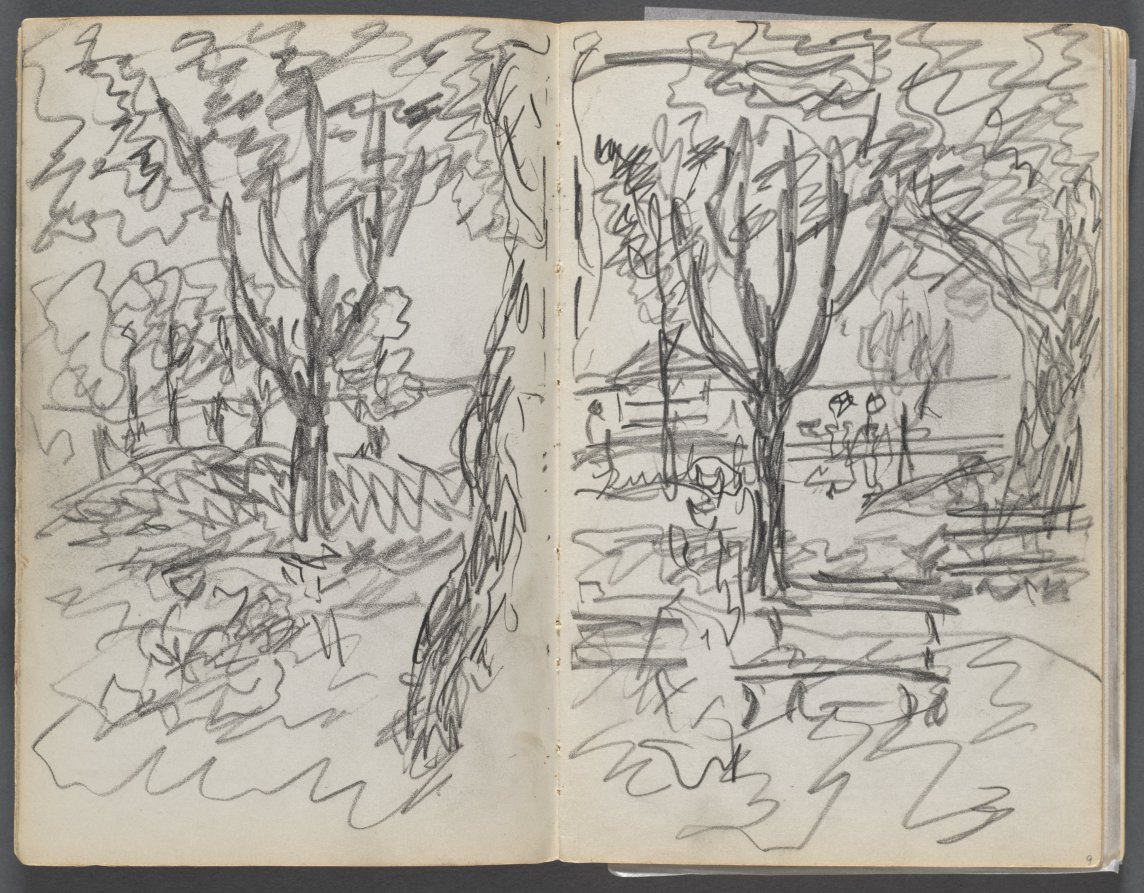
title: Sketchbook, The Dells, N° 127, page 008 & 9: Landscape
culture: America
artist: Maurice Prendergast (American, born Newfoundland [now Canada], 1858–1924)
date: c. 1919–1921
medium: graphite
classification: Bound Volume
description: This sketchbook contains 59 pages of graphite drawings and 16 watercolors made at various locations on Cape Ann, Massachusetts.